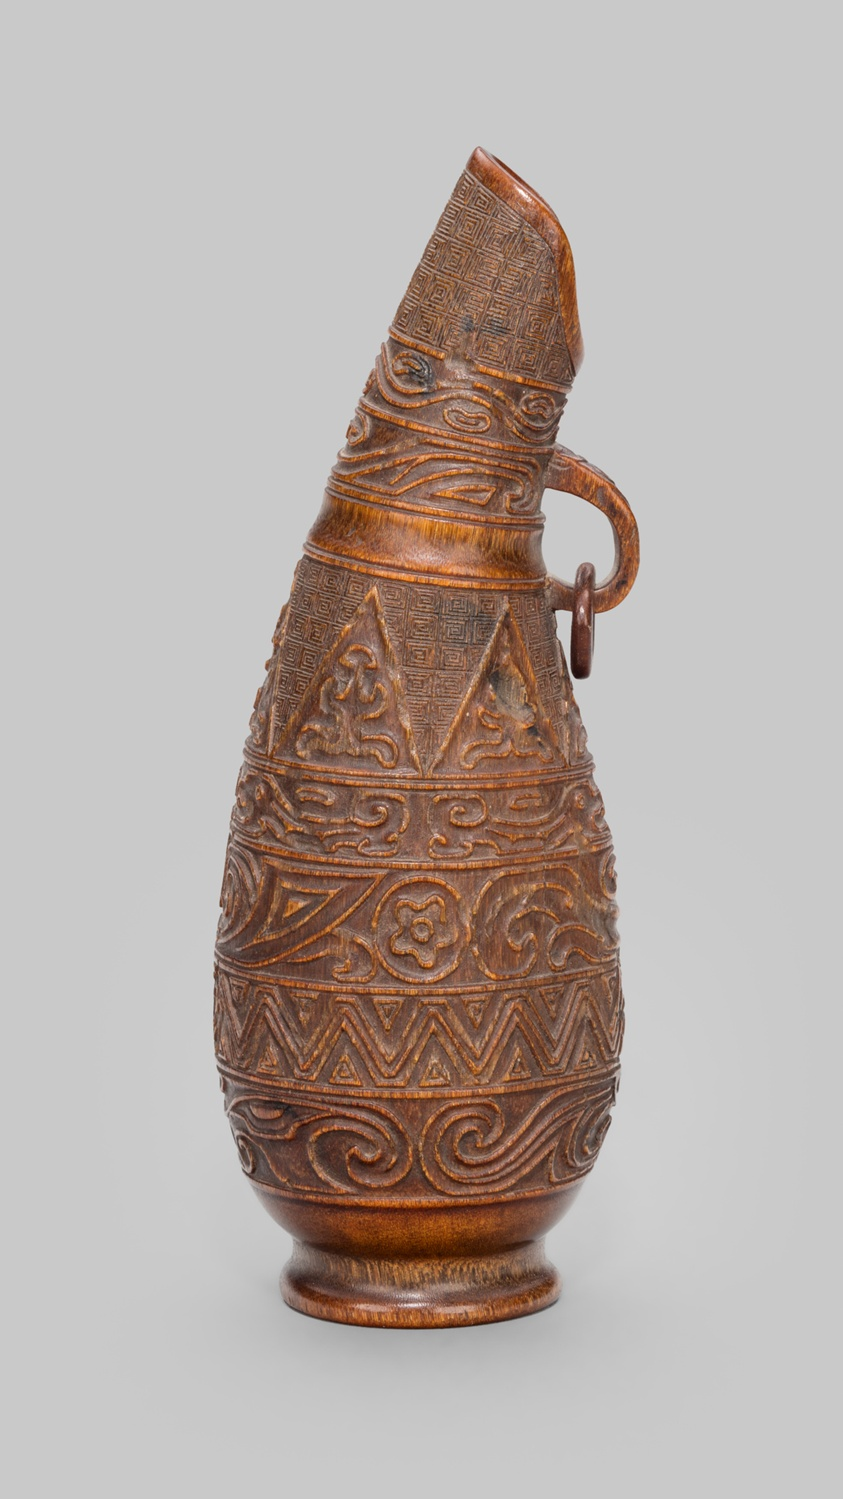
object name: Vessel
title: Miniature Bottle in the Form of an Ancient Bronze Jar (Hu)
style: Chinese (culture or style)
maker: China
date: Ming dynasty (1368–1644)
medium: Rhinoceros horn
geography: China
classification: rhinocerous horn; horn; vessel; asian art